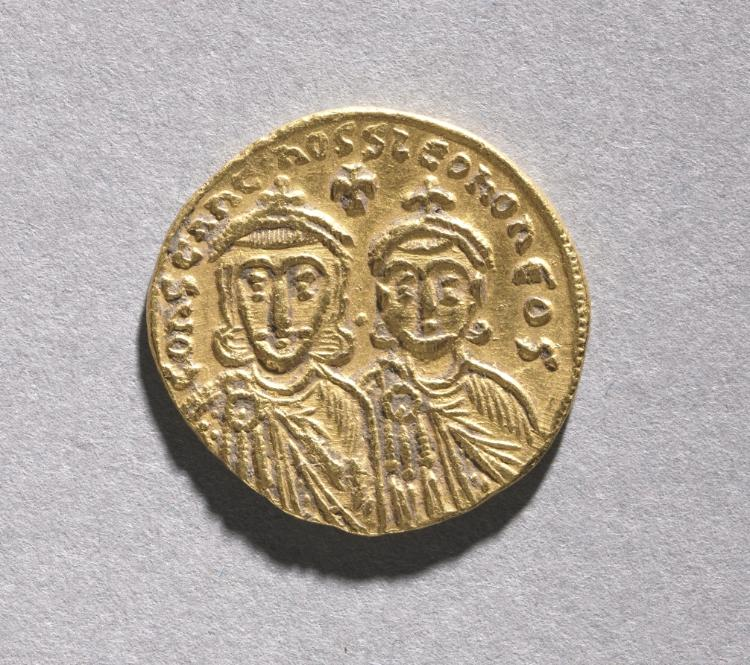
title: Solidus wtih Leo IV the Khazar and His Father Constantine V Copronymus (reverse)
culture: Byzantium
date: c. 751–775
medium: gold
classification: Coins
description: The vast number of surviving Byzantine coins attests to the level of trade across the empire. Controlled and supervised by the emperor, the producers of coins took care to represent his authority and reflect his stature. Talented artists were recruited to engrave the dies (molds) used for the striking of coins. Emperors increasingly came to include their heirs and co-emperors on their coinage, as well as other family members or even earlier rulers. Coins were recognized, then as now, as small, portable works of art. With their inscriptions and images, Byzantine coins provide valuable documentation of historical events and a record of the physical appearance of the emperors. The coins shown here include the solidus, the basic gold coin of 24 karats; the tremissis, a gold coin of one-third the weight and value of the solidus; and the nomisma, which in the 10th century replaced the solidus as the standard gold coin.